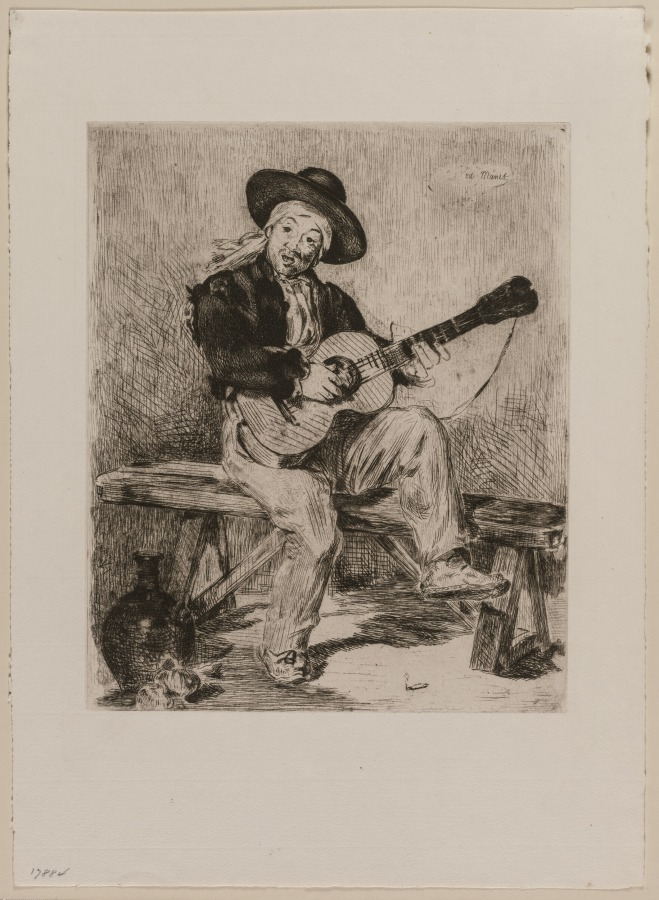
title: Le Guitarrero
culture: France, 19th century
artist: Édouard Manet (French, 1832–1883)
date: 1861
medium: etching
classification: Print